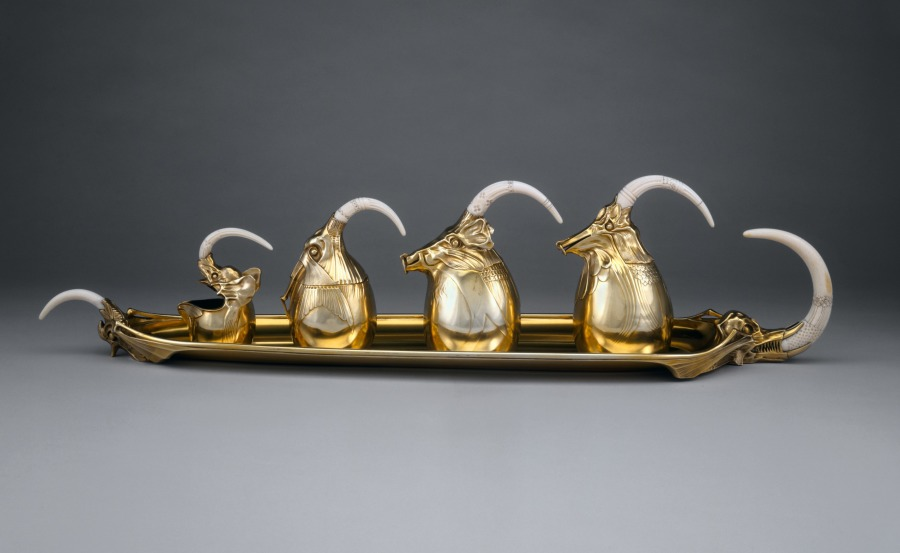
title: Tea and Coffee Service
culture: France, Paris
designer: Carlo Bugatti (Italian, 1856–1940)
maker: Adrien-Aurélien Hebrard (French, 1866–1937)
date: c. 1907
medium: gilt silver and ivory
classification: Silver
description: This tea and coffee service, salver, and table, together with some now missing cups, were all designed by Carlo Bugatti as an ensemble and presented at the 1902 exposition devoted to decorative arts in Turin, Italy. The set was probably acquired from Bugatti's 1907 exhibition at the Galerie Hébrard in Paris by a wealthy South African widow, Anna Blake, who was living there at the time. Some of the animal and insect motifs suggest mythical beasts or the fossils of prehistoric animals. When Mrs. Blake returned to Cape Town, she took these and other pieces designed by Bugatti with her, and they remained in South Africa throughout her lifetime.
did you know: Carlo Bugatti's sons achieved illustrious careers of their own. Rembrandt Bugatti (1884-1916) became a celebrated sculptor, and Ettore Bugatti (1881-1947) manufactured luxurious automobiles and racing cars.